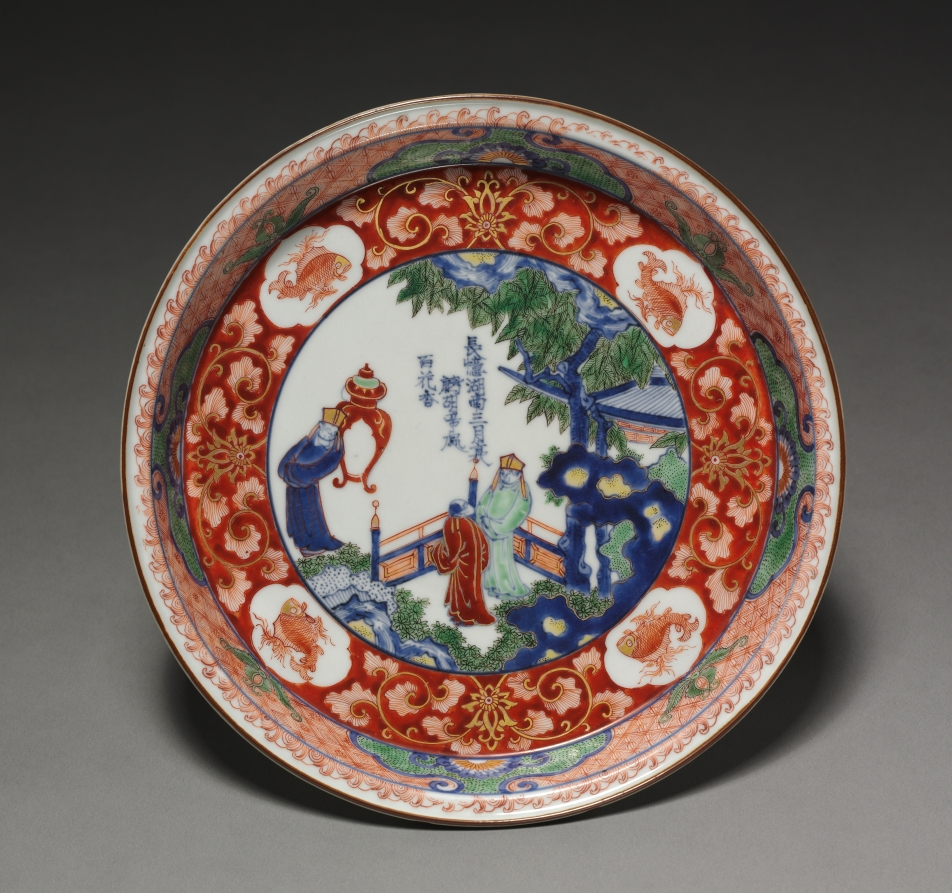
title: Dish with Figures in a Chinese Garden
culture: Japan, Edo period (1615–1868)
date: 1700s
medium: Porcelain with underglaze blue and overglaze color enamel and gold, with iron oxide rim (Arita ware)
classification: Ceramic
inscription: 長憶湖江南三月裏、鷓鴣啼処百花香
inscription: 大明嘉靖年製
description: This dish is inscribed with a poem from The Gateless Gate, a text compiled by Chinese Chan (Zen) master Wumen Huikai (1183–1260). The verse reads, “I always remember the spring in Jiangnan. Where the partridges sing; how fragrant the countless flowers!”